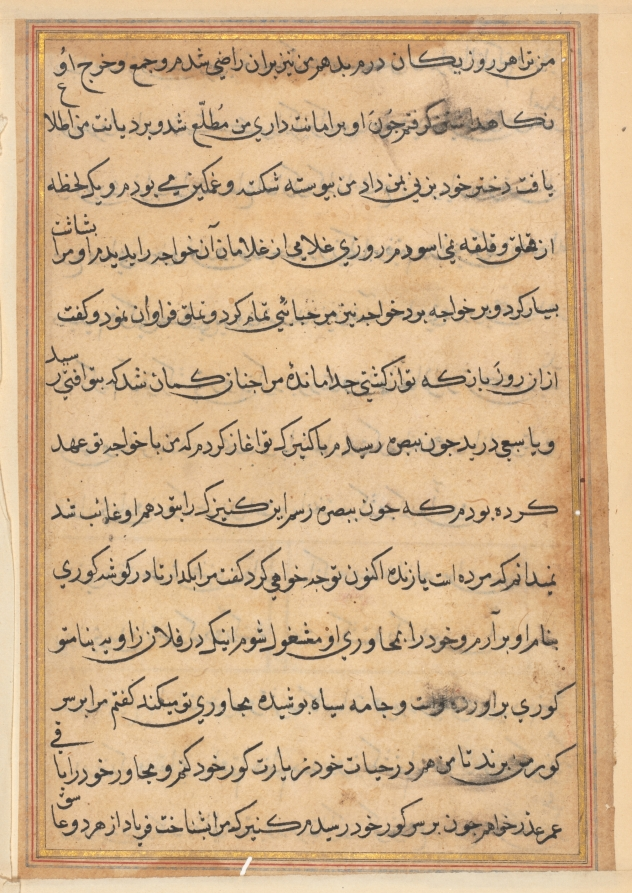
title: Page from Tales of a Parrot (Tuti-nama): text page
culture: Mughal India, court of Akbar (reigned 1556–1605)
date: c. 1560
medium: gum tempera, ink, and gold on paper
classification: Painting